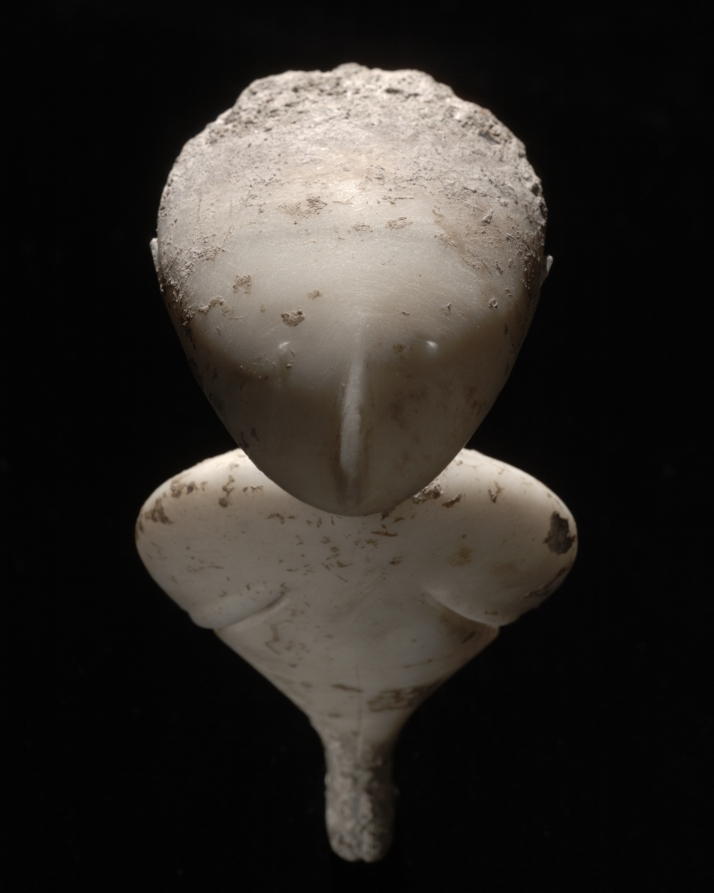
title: Statuette of a Woman: "The Stargazer"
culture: Western Anatolia, early Bronze Age (c. 3300–1200 BCE)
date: c. 3000 BCE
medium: marble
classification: Sculpture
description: "The Stargazer" moniker was given to this diminutive marble sculpture because its upturned head looks toward the heavens. Details carved into the stone are visible while painted features have been lost to time. We do not know how this object was used, but its enigmatic nature invites speculation.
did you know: We can identify this mysterious figure as female by the inscribed pubic triangle below her waist.